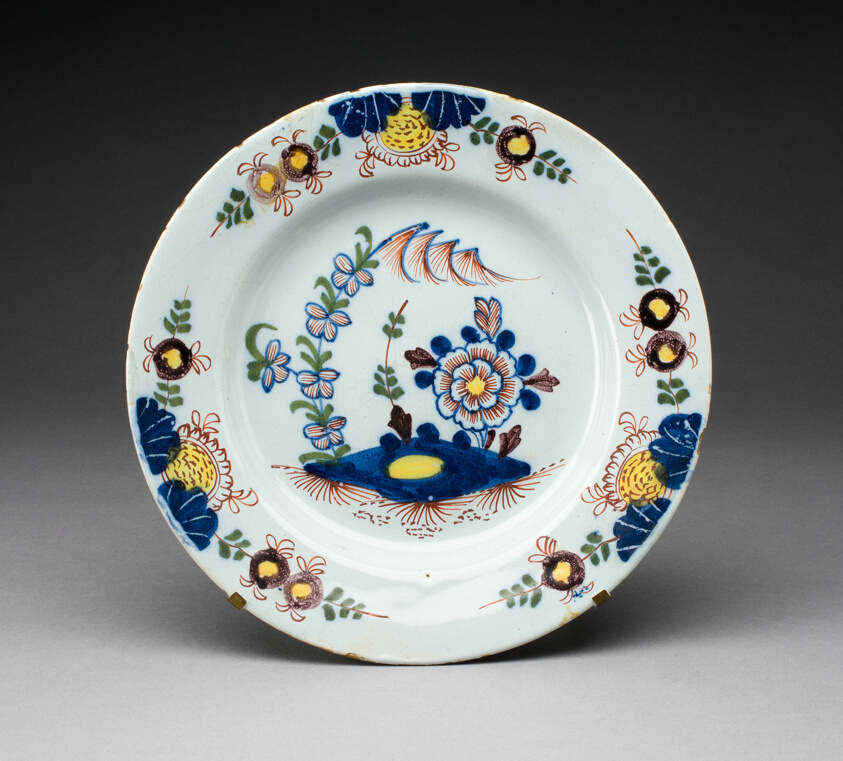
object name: Ceramics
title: Plate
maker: England, Lambeth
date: c. 1750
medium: Tin-glazed earthenware (Delftware)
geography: Lambeth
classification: plate (general, dish); dish (vessel); earthenware; ceramics; european decorative arts